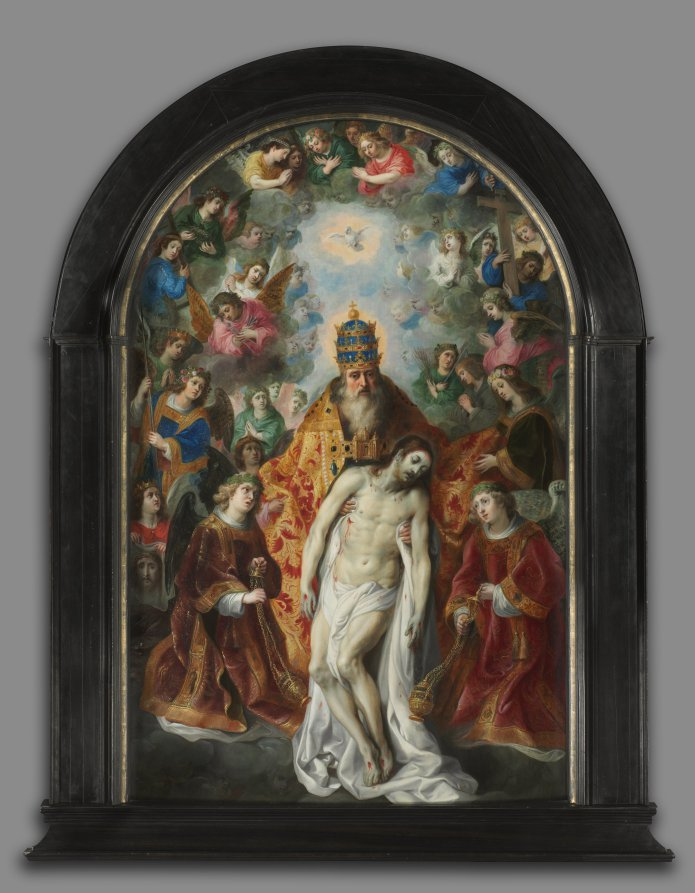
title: The Trinity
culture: Flanders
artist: Hendrik van Balen (Flemish, 1575–1632)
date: c. 1620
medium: oil on wood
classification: Painting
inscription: signed lower left: H.V. Balen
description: This vividly colored altarpiece was made in Antwerp, the center of religious learning in Catholic Flanders. In the mid-1500s when the Catholic Church mounted a defense against the spread of Protestant reforms, known as the Counter-Reformation, it encouraged the production of religious images that promoted Catholic doctrine, offering opportunities for artists like Rubens, Van Dyck, and Van Balen. Van Balen’s painting depicts the traditional theme of the Trinity, with God the Father holding the dead Christ and the dove of the Holy Spirit hovering above. Unusually, God wears the purple papal tiara, intended to emphasize the pope’s role as God’s true representative on earth. Encircling the figures of the Trinity are angels holding the instruments of Christ’s Passion. On the clasp of God’s elaborate cape is a small figure of Saint Barbara, perhaps a clue to the original location of the work in a chapel dedicated to her.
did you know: The crown worn by God in this painting resembles a papal tiara, last used by a Catholic pope in 1964.